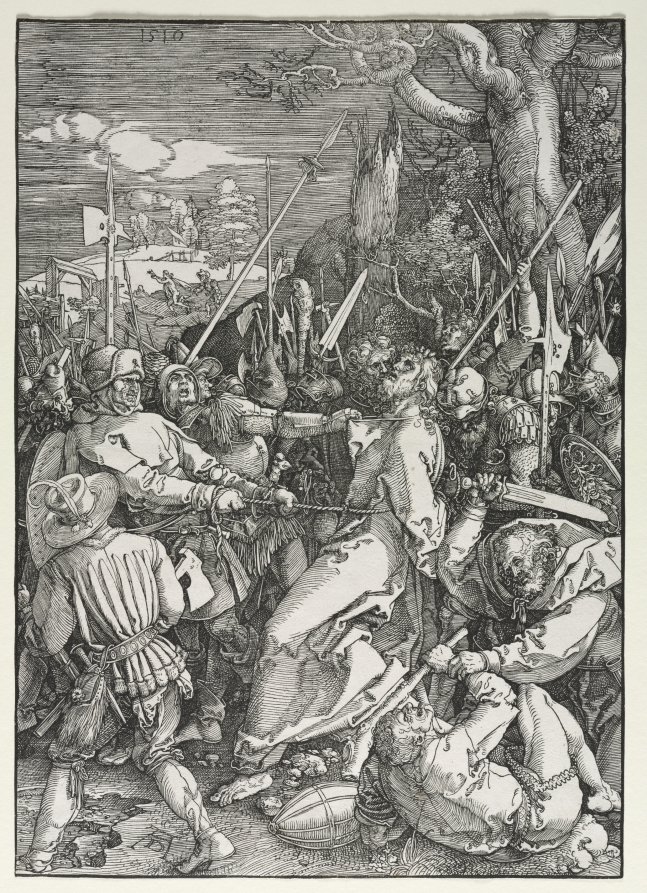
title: The Large Passion: The Betrayal of Christ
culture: Germany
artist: Albrecht Dürer (German, 1471–1528)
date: 1510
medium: woodcut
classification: Print